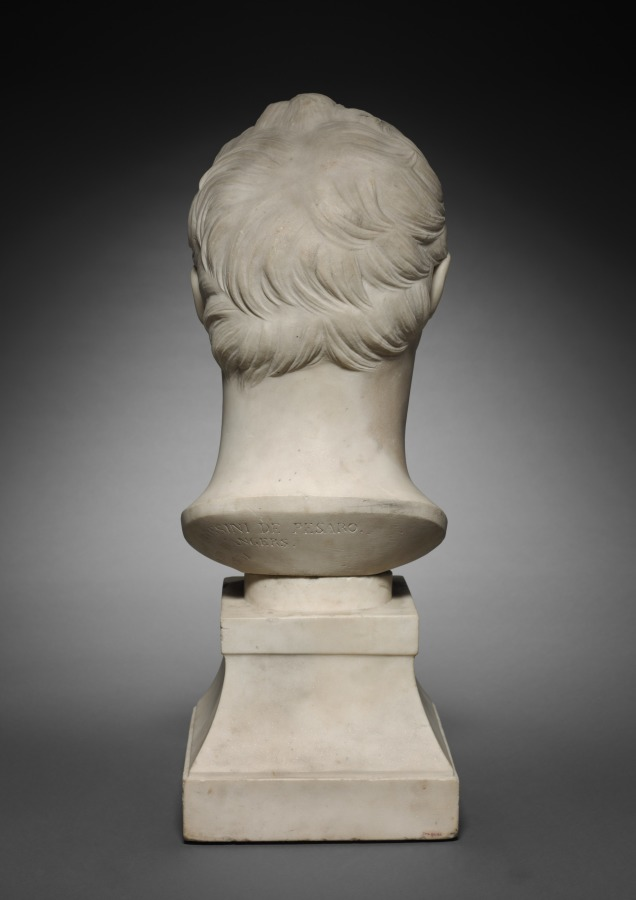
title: Bust of Rossini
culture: France, 19th century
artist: Pierre Jean David d'Angers (French, 1788–1856)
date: 1831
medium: marble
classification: Sculpture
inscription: inscribed at back of neck: A / Joachino Rossini de Pesaro / P.J. David d'Angers / 1831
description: Gioacchino Antonio Rossini (1792–1868) was a composer most famous for his comic operas. Although of Italian birth, much of Rossini's later life was spent in Paris, where he undoubtedly sat for this portrait for David d'Angers, whose ambition it was to sculpt portraits of all the famous people of his day.